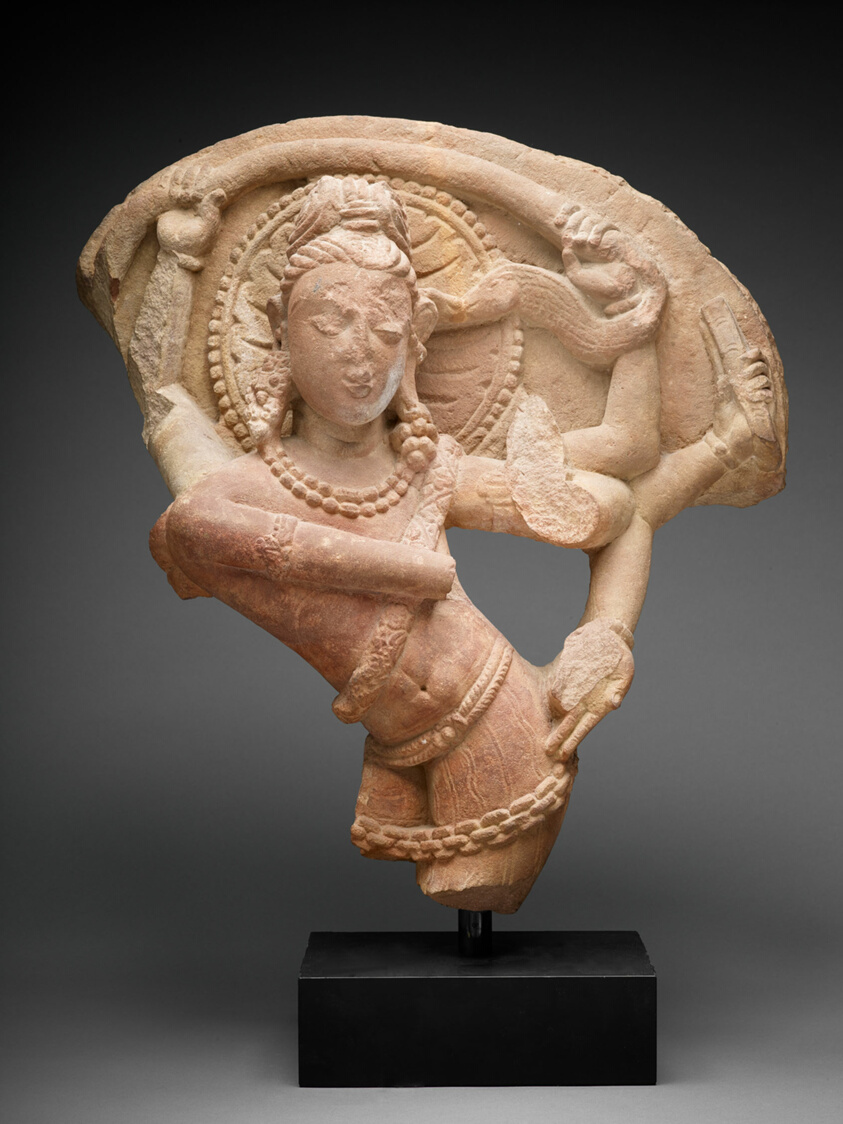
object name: Sculpture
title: Dancing God Shiva (Natesha)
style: South Asian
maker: India; Rajasthan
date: 10th/11th century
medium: Sandstone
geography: Rajasthan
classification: stone (unidentified); stone; sculpture; asian art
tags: dancing, gods (deities), Hindu, religion, Shiva Nataraja